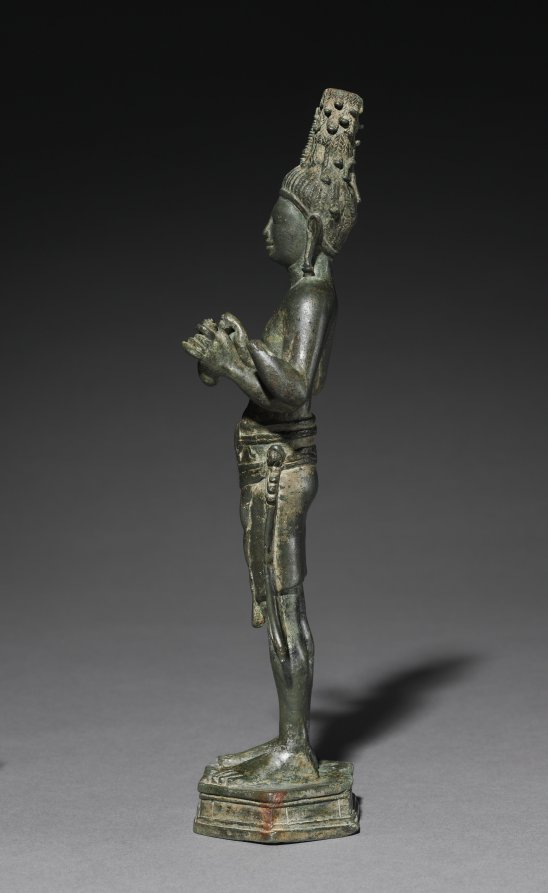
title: Maitreya: The Buddha of the Future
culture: Cambodia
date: 600s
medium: bronze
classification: Sculpture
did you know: The slender fingers of the left hand hold a water pot while the right hand is in the gesture of the vitarka mudra, a gesture of explanation and exposition.